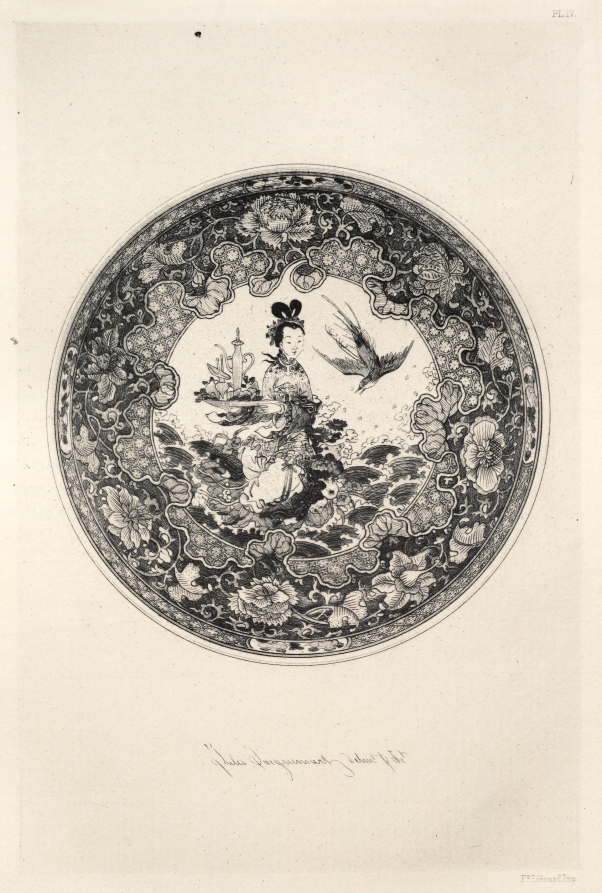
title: History of the Ceramic Art: A Descriptive and Philosophical Study of the Pottery of All Ages and All Nations: Asia Minor: Faience- Votice Lamp from a Mosque, XVth Century (Plate V)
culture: France, 19th century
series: Book by Albert Jacquemart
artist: Jules Jacquemart (French, 1837–1880)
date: 1877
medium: etching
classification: Bound Volume